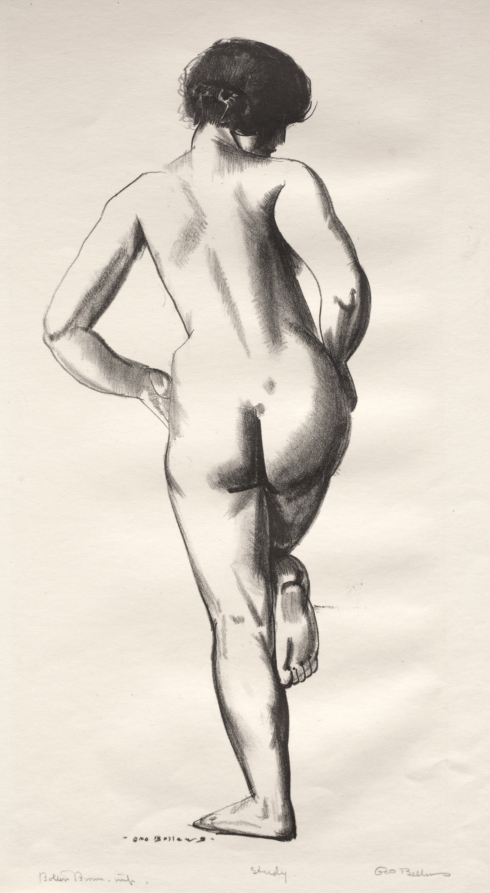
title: Nude Study, Girl Standing on One Foot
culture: America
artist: George Bellows (American, 1882–1925)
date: 1924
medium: lithograph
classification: Print